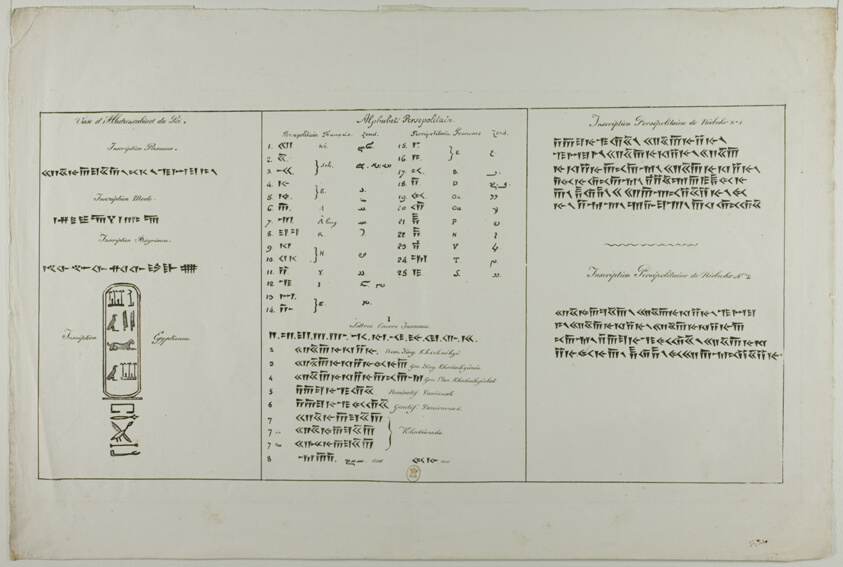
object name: Print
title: Plate of Persian and Egyptian Inscriptions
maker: Monogrammist B.D.P. (possibly French, 18th-19th century)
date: c. 1817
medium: Lithograph in black on ivory wove paper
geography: France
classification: lithograph; print; prints and drawing